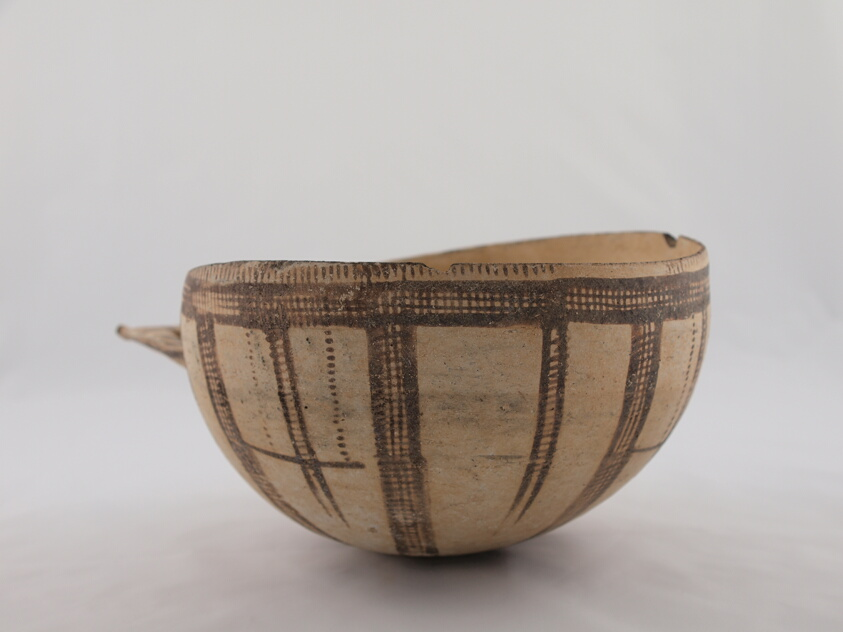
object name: Vessel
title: Bowl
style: late bronze age, bronze age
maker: Cypriot; Cyprus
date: Late Bronze Age, 1450-1200 BCE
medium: terracotta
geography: Cyprus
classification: bowl; ceramics; dish (vessel); vessel; ancient art